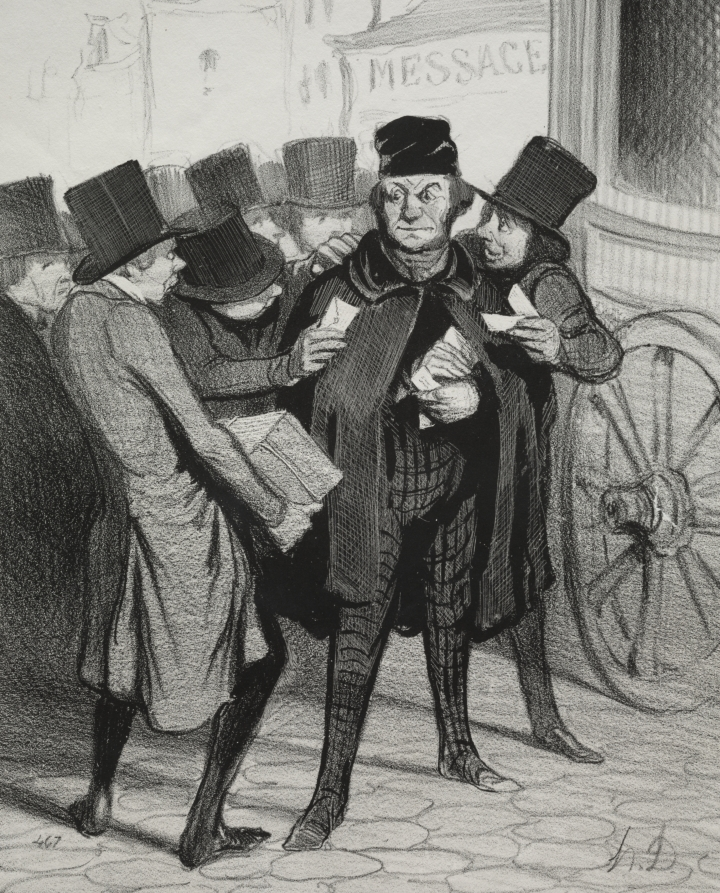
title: A Pleasure Trip to Paris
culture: France, 19th century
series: Review in Caricatures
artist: Honoré Daumier (French, 1808–1879)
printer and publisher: Aubert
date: 1843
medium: lithograph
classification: Print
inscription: Above image, printed: REVUE CARICATURALE ; below image, printed: UN VOYAGE D'AGRÉMENT A PARIS. / -Mon cher ami, puisque vous partez pour Paris, ayez donc la complaisance de vous charger de cette petite lettre! / -De cette petite commission! -De cette petite malle! -Rapportez-moi quinze livres de graine moutarde blanche.... / -N'oubliez pas mon racahout des Arabes... ni le biberons Darbo pour ma femme. / (Le voyageur à part) -Que le diable les emporte!... dans les huit jours que je vais passer à Paris, on ne me laissera / pas seulement un quarte d'heure pour aller voir l'Obélisque!.....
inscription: Upper margin, in penicl: 19 LeG / v.3-4 / #24 / D. 436 ; lower margin, printed: Chez Pannier Editr. R. du Croissant, 16 / Chez Aubert, Pl. de la Bourse, 29 / Imp. d'Aubert & Cie. ; in pencil: H.D. 436 (Le G - 26 - 240 ) / 1843 / ( also published in La Caricature / in state II - 18 June 1843 ) / D.III.1012 IV/IV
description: This print was published in La Caricature (June 18, 1843) as plate 24 from the series Review in Caricatures.